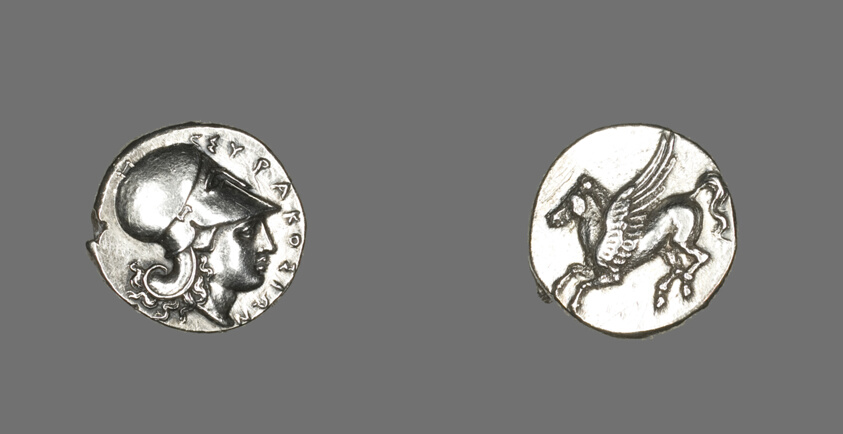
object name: Coin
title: Stater (Coin) Depicting the Goddess Athena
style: Classical, greek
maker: Greek, minted in Syracuse, Sicily, Italy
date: 345-317 BCE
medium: Silver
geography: Syracuse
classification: coin; ancient art